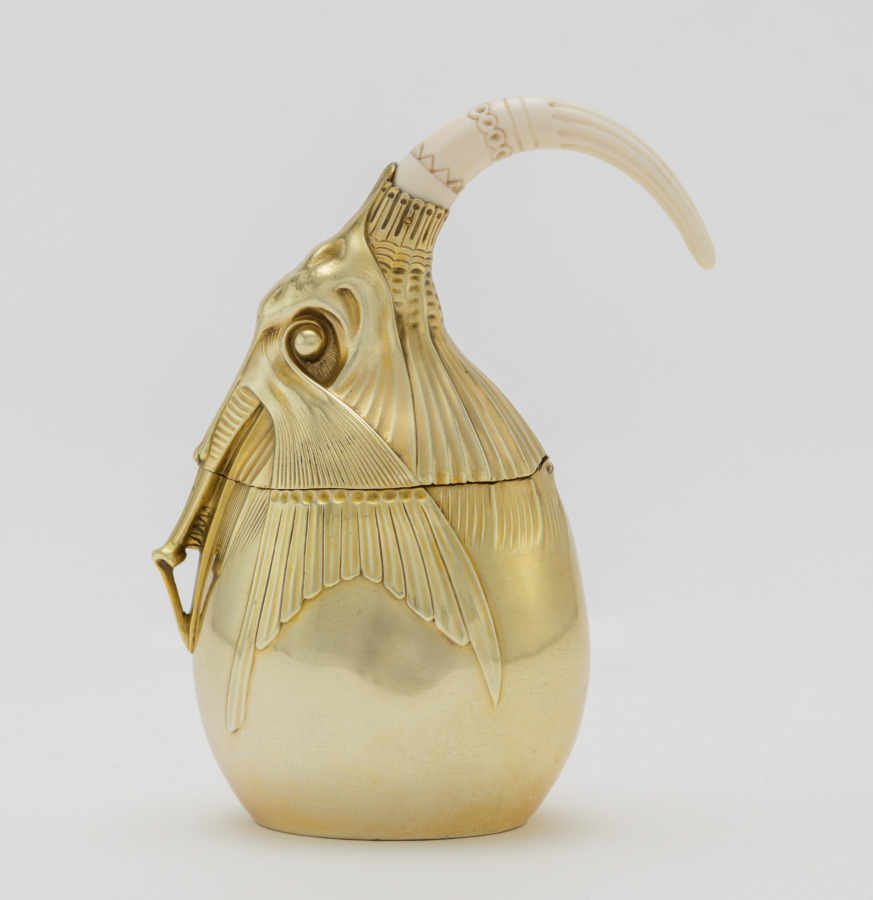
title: Covered Sugar Bowl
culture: France, Paris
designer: Carlo Bugatti (Italian, 1856–1940)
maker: Adrien-Aurélien Hebrard (French, 1866–1937)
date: c. 1907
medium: Gilt silver and ivory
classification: Silver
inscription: Made by A. A. Hebrard Firm, Paris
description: This tea and coffee service, salver, and table, together with some now missing cups, were all designed by Carlo Bugatti as an ensemble and presented at the 1902 exposition devoted to decorative arts in Turin, Italy. The set was probably acquired from Bugatti's 1907 exhibition at the Galerie Hébrard in Paris by a wealthy South African widow, Anna Blake, who was living there at the time. Some of the animal and insect motifs suggest mythical beasts or the fossils of prehistoric animals. When Mrs. Blake returned to Cape Town, she took these and other pieces designed by Bugatti with her, and they remained in South Africa throughout her lifetime.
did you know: This covered sugar bowl is part of a larger tea and coffee service designed by Carlo Bugatti.